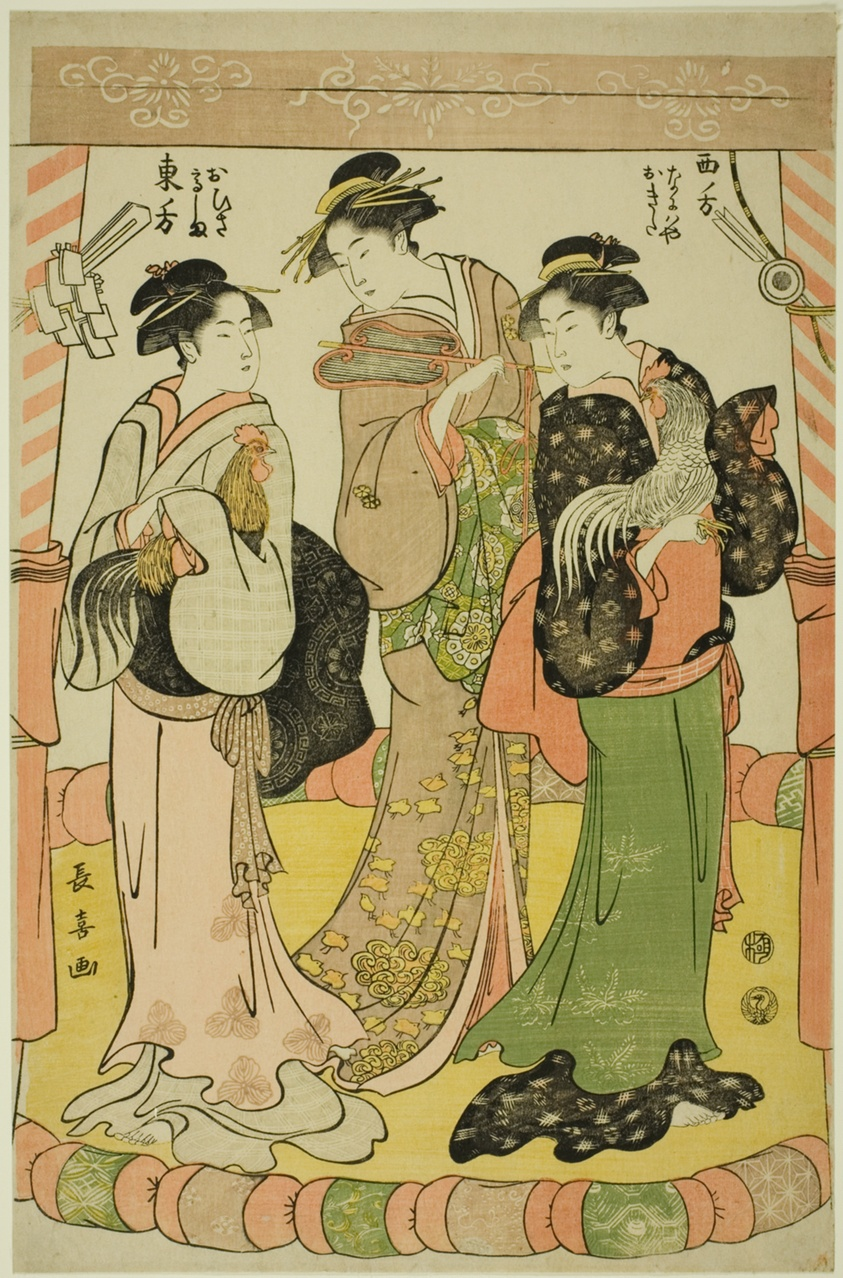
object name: Print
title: The Cock Fight - Ohisa of the Takashimaya and Okita of the Naniwaya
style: Japanese (culture or style)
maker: Eishosai Choki (Japanese, active c. 1790s-early 1800s)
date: c. 1791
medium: Color woodblock print; oban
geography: Japan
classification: woodblock print; print; asian art